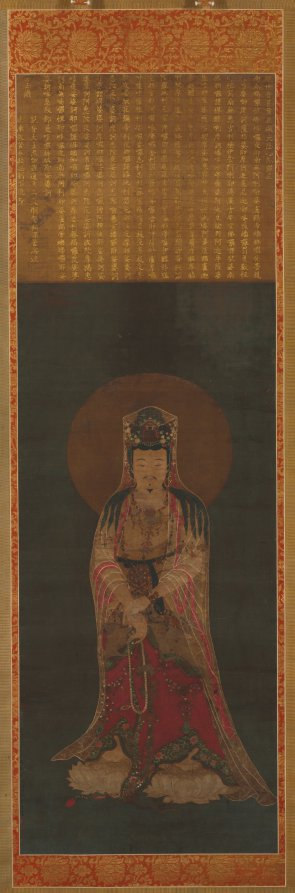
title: Kannon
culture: Japan, Meiji period (1868–1912)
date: c. 1868–1912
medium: hanging scroll; ink and color on silk; inscription in gold ink on silk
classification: Painting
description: The bodhisattva Avalokiteshvara (Kannon in Japanese) stands with each of his feet upon a lotus blossom. The Buddha Amitabha (Amida in Japanese) appears in his headdress. The text written in golden characters attached to the top of the painting is a portion of a religious text extolling the virtues of the bodhisattva. The painter was inspired by Buddhist paintings of the Korean Goreyo period (918–1392); he attempted to reproduce the diaphanous shawl sometimes seen in such early works.